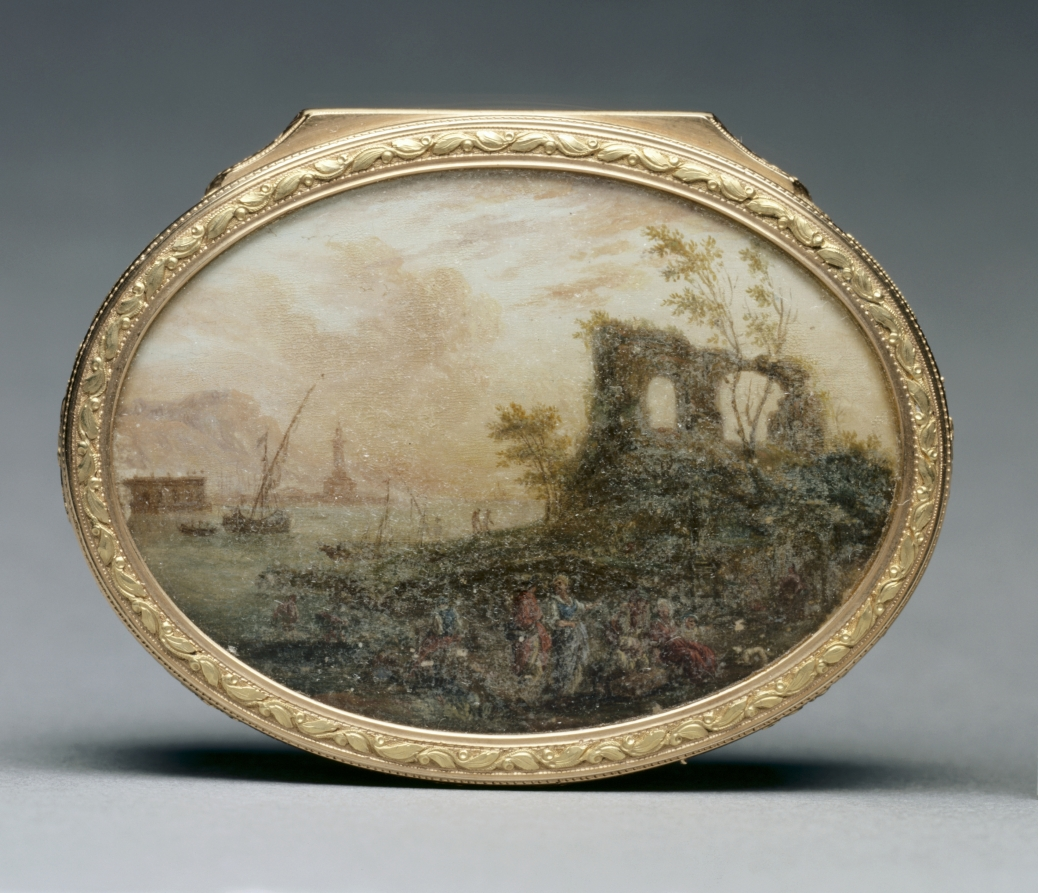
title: Snuff Box (Tabatière)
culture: France, 18th century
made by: Pierre-Nicholas Pleyard (French)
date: 1768–69; 1776–78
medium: gouache miniatures mounted on gold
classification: Metalwork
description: Snuff boxes were highly ornamented functional objects popular among French social elites. They were simultaneously containers for powdered tobacco and a means to communicate social and political status. Often decorated with miniature paintings inspired by popular paintings of the time, the works reproduced on this box are modeled after those of Claude-Joseph Vernet (cover and front panel) and David Teniers the Younger (base, side, and back panels).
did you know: These miniature paintings are mounted à cage, a practice popular in the mid-1700s that involved setting decorated panels into gold frames to create a box’s walls.